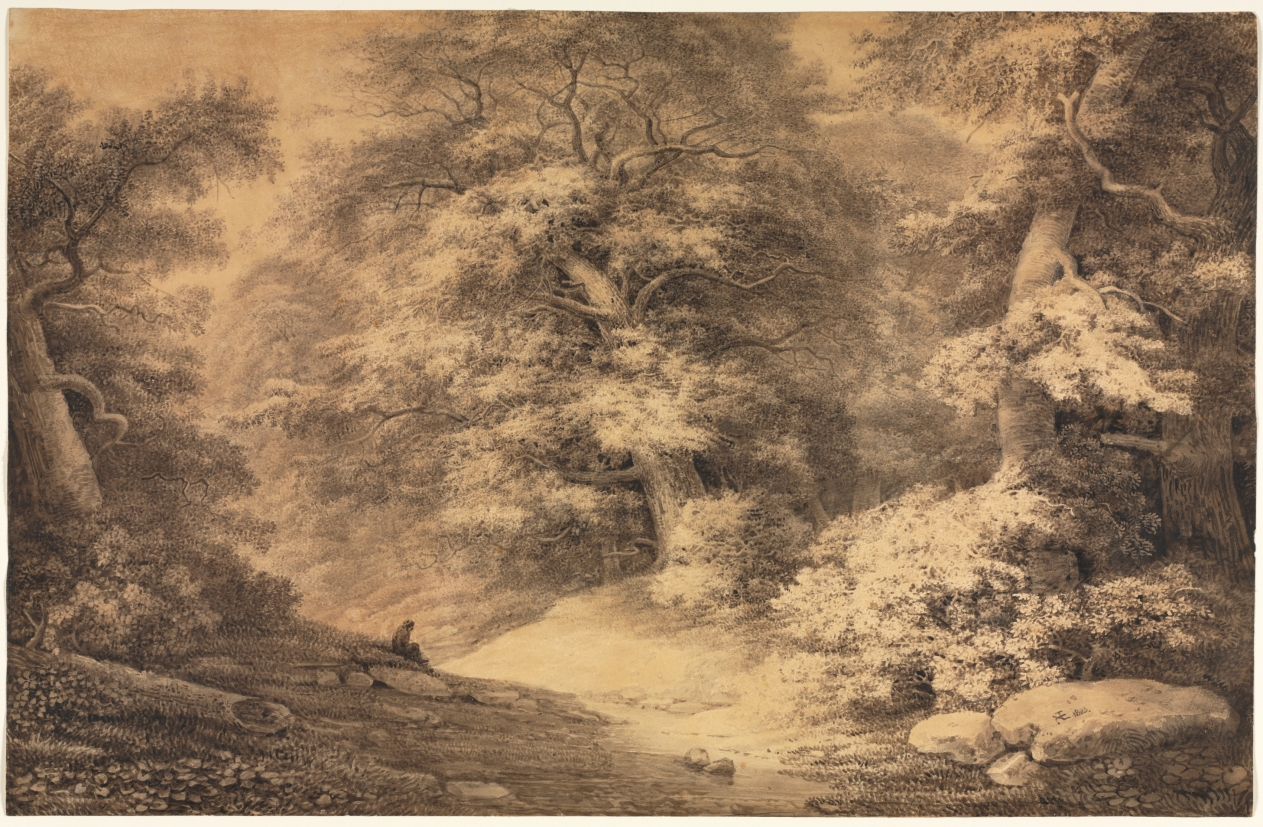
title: A Beech Wood with a Resting Traveler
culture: Germany, 19th century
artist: Christoph Nathe (German, 1753–1806)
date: 1803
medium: brown and gray wash with extensive point of brush work, with traces of black chalk underdrawing on ivory wove paper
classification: Drawing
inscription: Inscribed lower right in brown watercolor:" CN 1823" Verso: collector's stamp, in light brown ink: "Dr. Apelt / Zittau enclosed in a square [not in Lugt]" in graphite: "No. 6 [crossed out]" in blue ink: "Nathe"